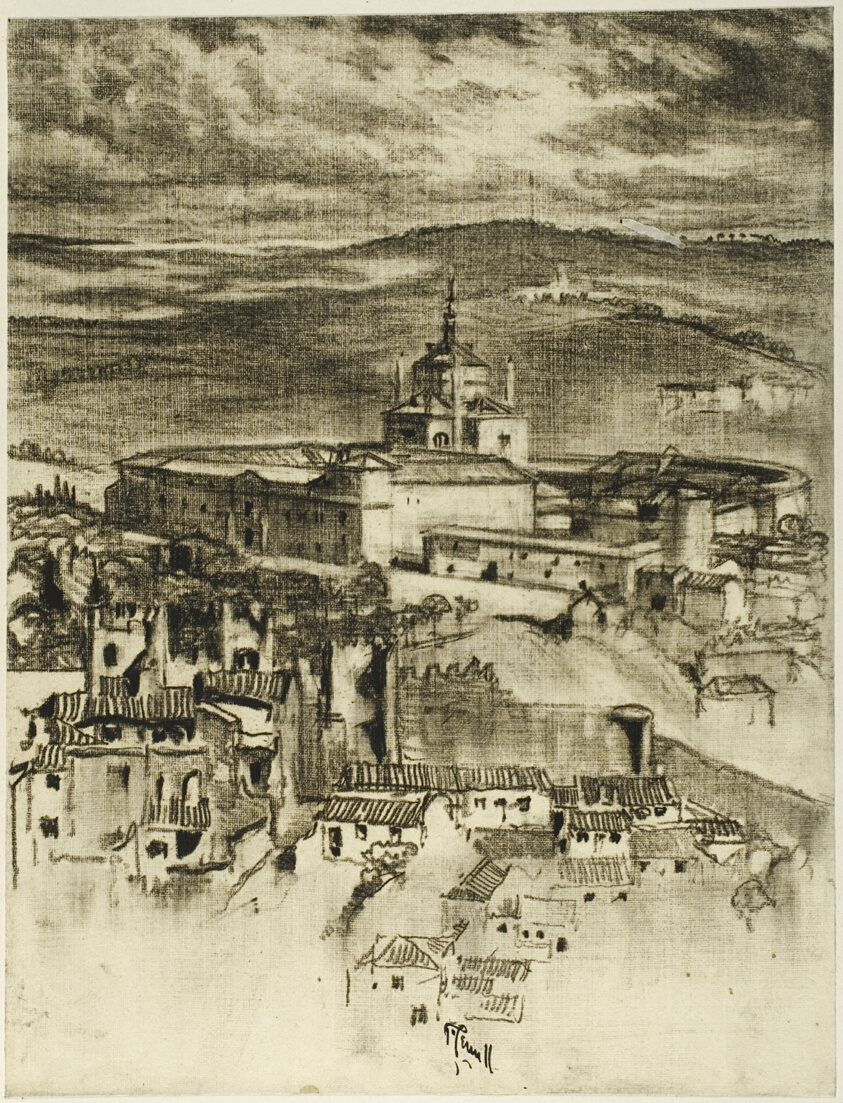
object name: Drawing and Watercolor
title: The Hospice of Saint John, Toledo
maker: Joseph Pennell (American, 1857-1926)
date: c. 1903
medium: Oiled charcoal with stumping and erasing, on cream wove paper, perimeter mounted on off-white wood pulp laminate board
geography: United States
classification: charcoal; drawings (visual works); prints and drawing